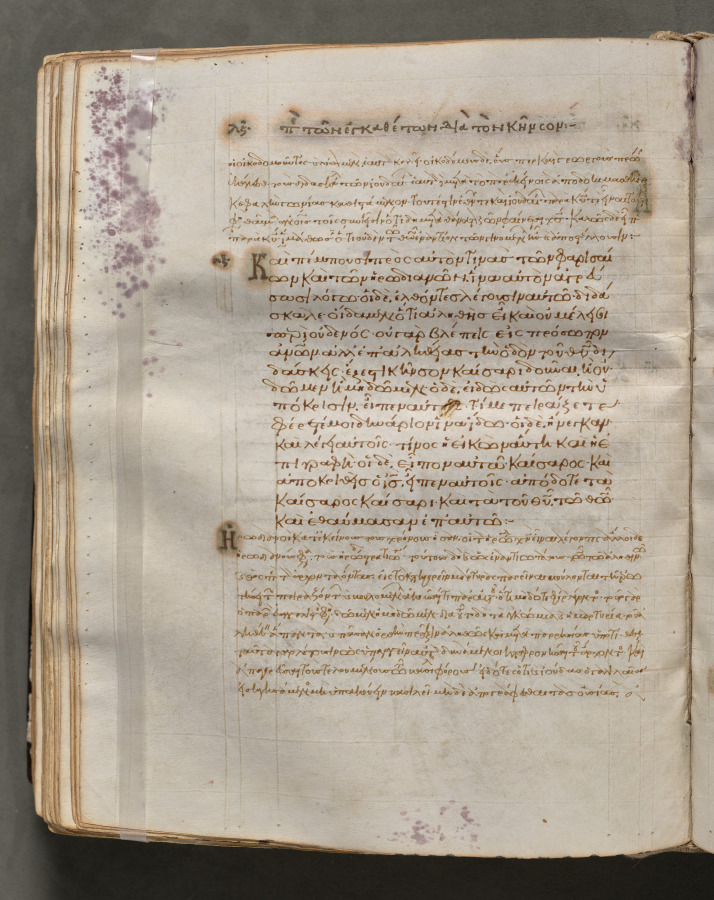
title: Text, folio 177 (verso), from a Gospel Book with Commentaries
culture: Byzantium, Constantinople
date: c. 1000–1100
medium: ink, tempera, and gold on vellum; leather binding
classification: Bound Volume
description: Each of the four gospels in this book opens on a page with brilliantly illuminated borders depicting the author of the text as well as birds-principally peacocks, symbols of the immortality of the soul-and fountains, representing the fountain of life and the salvation of the soul. This volume consists of 428 leaves with texts in Greek. Its level of sophistication suggests that it was probably written and decorated in a monastery in Constantinople.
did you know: Gospel Books were carried in procession through Byzantine churches.